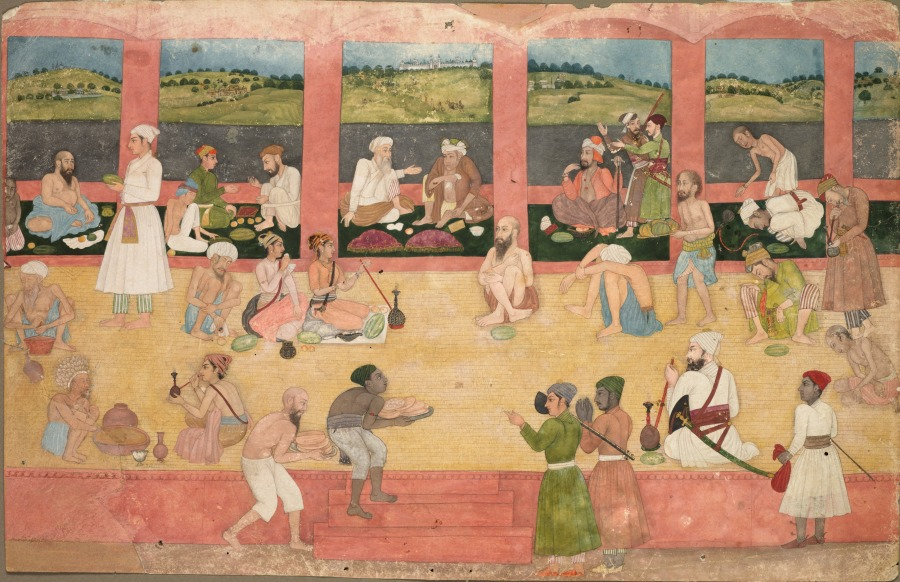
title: Opium Smokers Served Fruit and Bread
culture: India, Mughal Dynasty (1526-1756)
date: c. 1750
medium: Gum tempera and gold on paper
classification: Painting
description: A red sandstone terrace and veranda covered with a straw mat is the setting for an assemblage of more than 30 religious figures and nobles, most of whom are depicted in varying stages of intoxication and hangovers. To the left of center is a female ascetic wearing a peach-colored robe, and throughout the composition Sufi mystics wearing blue are interspersed with white-robed clerics and Mughal nobles. Some lucidly engage in discussions, while others prepare, ingest, and experience the effects of cannabis or opium known to have been taken regularly by those seeking mind-altering states. Watermelons, apples, and flatbread are being distributed among the assembled guests.